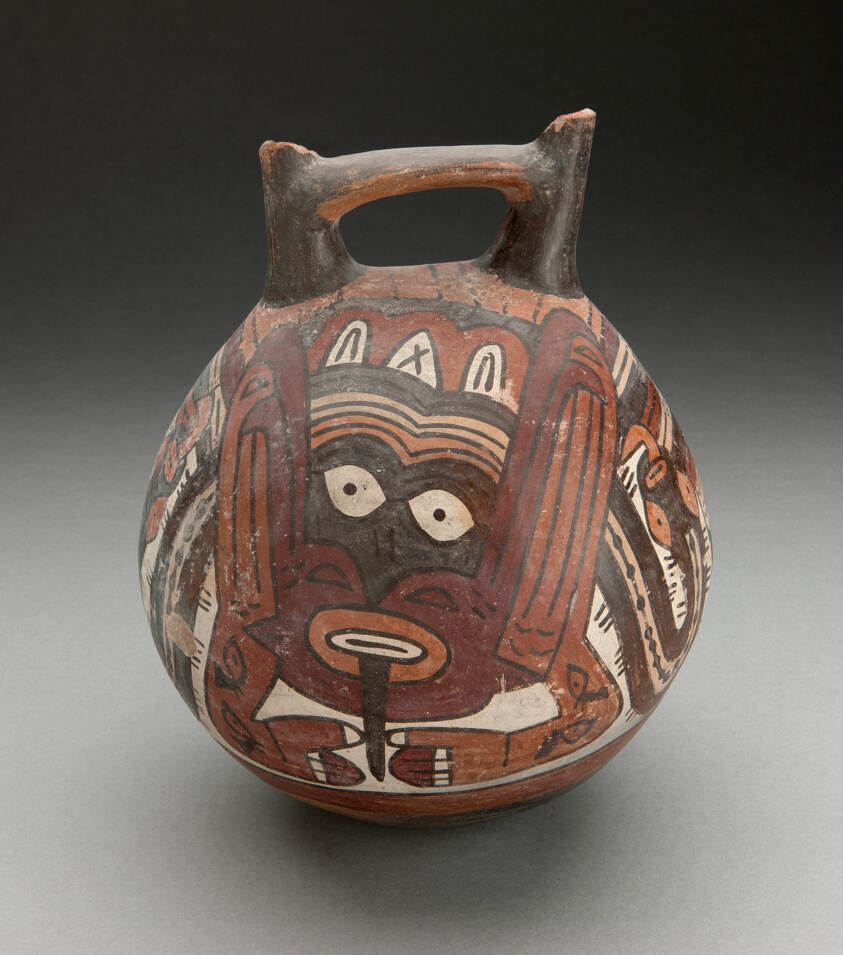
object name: Vessel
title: Double Spout Vessel Depicting Costumed Figure with Tattoos and Serpent Attributes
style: nazca, early intermediate period, Pre-Columbian, americas, Arts of the Americas, andean, andes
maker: Nazca; South coast, Peru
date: 180 BCE–500 CE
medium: Ceramic and pigment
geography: Nazca Valley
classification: earthenware; art of the americas; ceramics; vessel